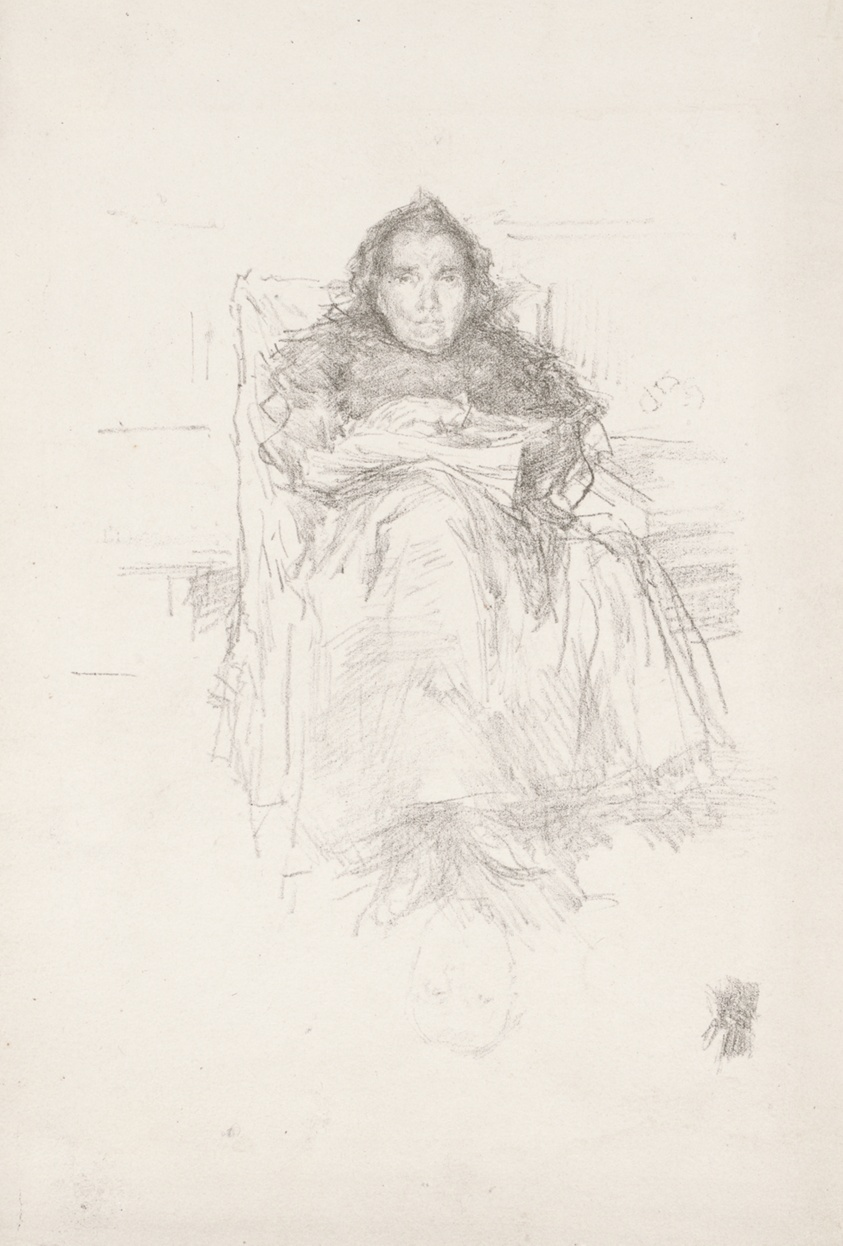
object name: Print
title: Portrait Study: Mrs. Philip, No. 3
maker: James McNeill Whistler (American, 1834-1903)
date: 1897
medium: Transfer lithograph in black on ivory plate paper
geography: United States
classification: transfer lithograph; lithograph; print; prints and drawing; paper